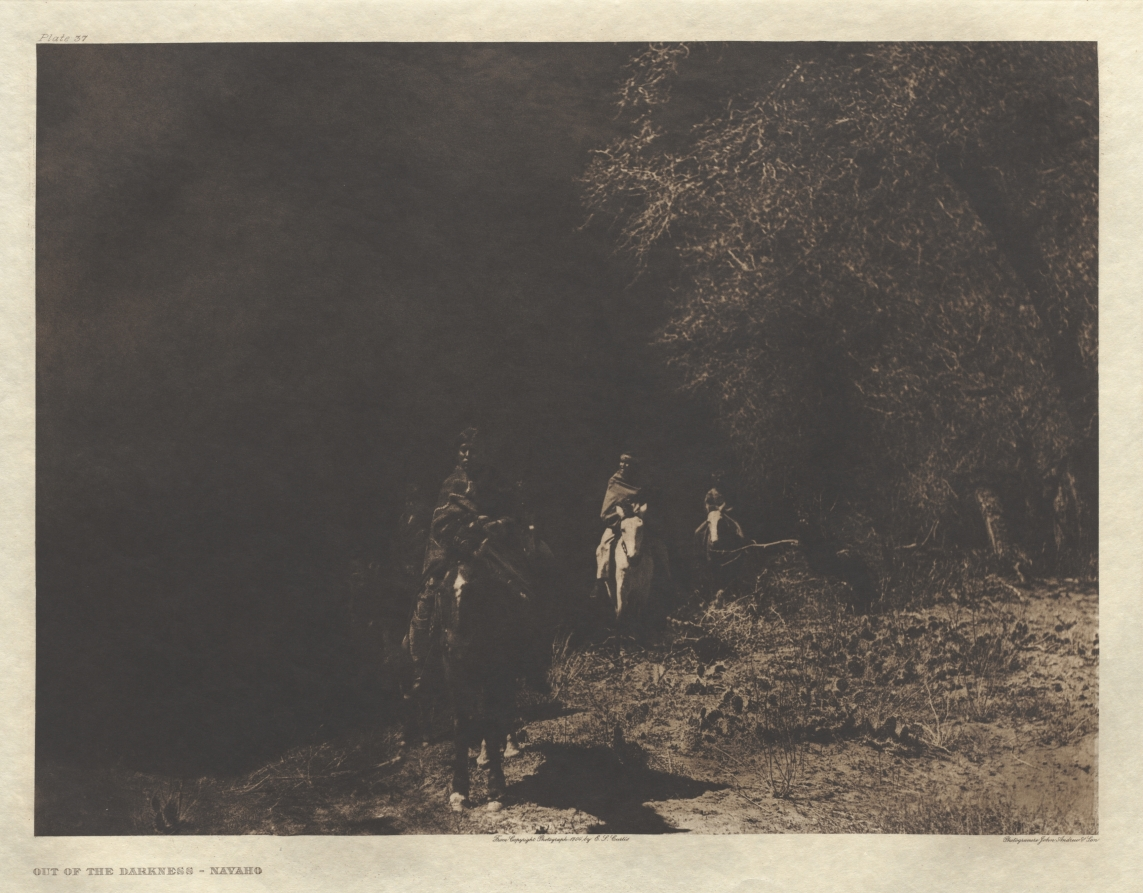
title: Portfolio I, Plate 37: Out of the Darkness-Navaho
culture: America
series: The North American Indian: being a series of Portfolios picturing and describing the Indians of the United States, the Dominion of Canada, and Alaska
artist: Edward S. Curtis (American, 1868–1952)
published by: The University Press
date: 1904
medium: photogravure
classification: Portfolio